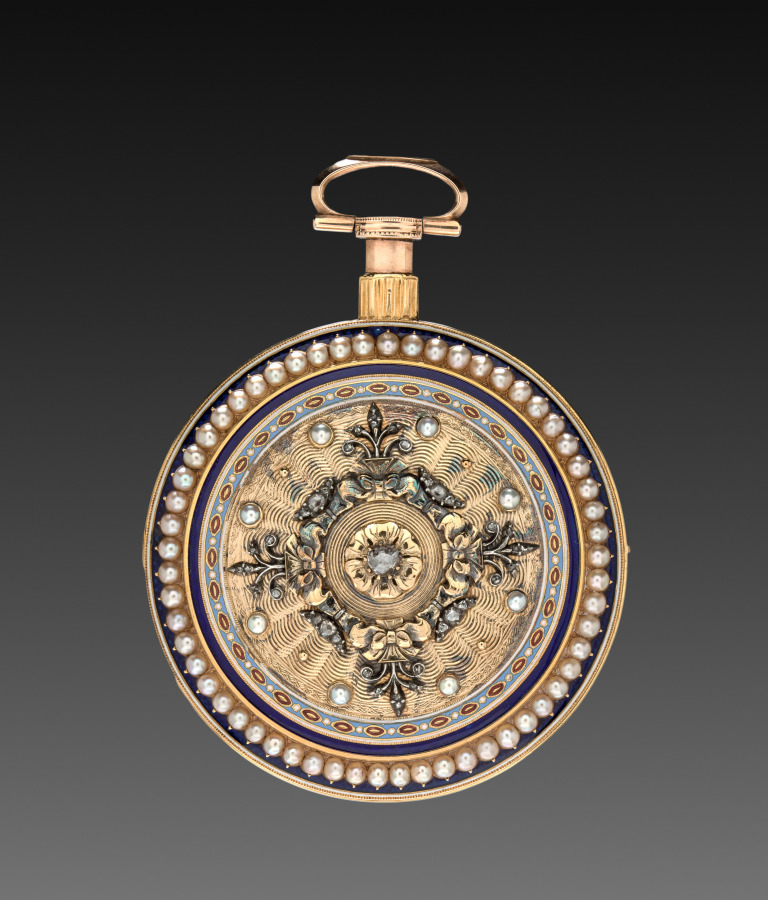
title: Watch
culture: England, 19th century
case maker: John Ray (British)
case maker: James Montague (British)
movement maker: Just and Son (British)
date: 1813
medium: gold, silver, pearls, diamonds, and enamel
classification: Jewelry